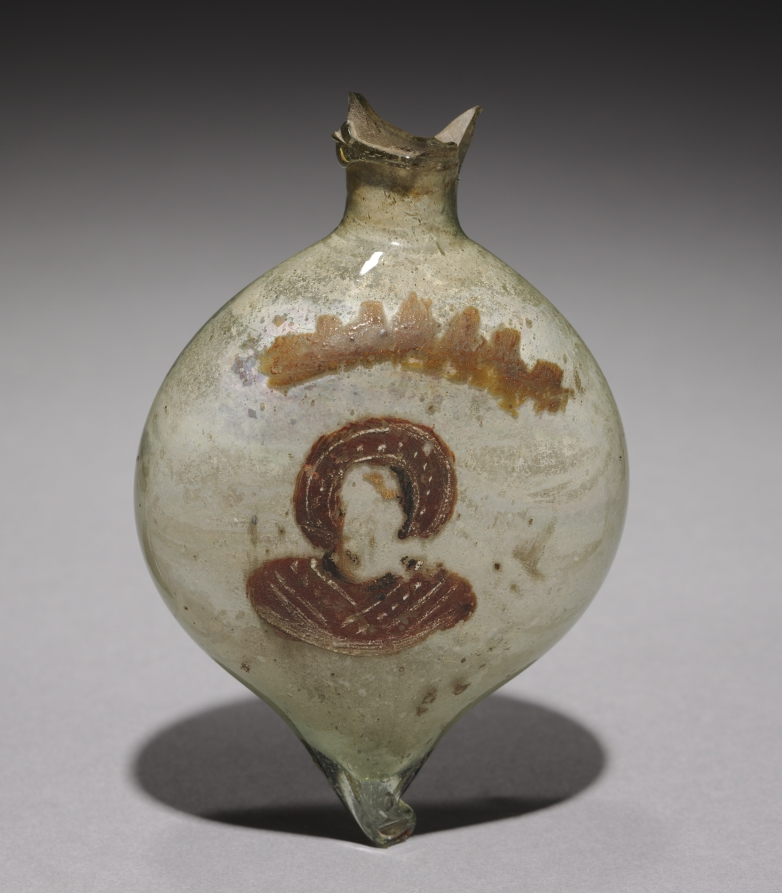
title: Pilgrim's Flask with Nimbed Figure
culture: Byzantium, Syria-Palestine, Byzantine period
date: c. 400–600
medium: opaque glass with paint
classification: Glass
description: Ampullae (small flasks) from pilgrimage sites were made of metal, terracotta, or glass. Because of their fragility, glass ampullae survive less abundantly than the other materials. This example was painted with the image of an unidentified saint bearing a nimbus or halo. It must have been used in conjunction with this saint's shrine.